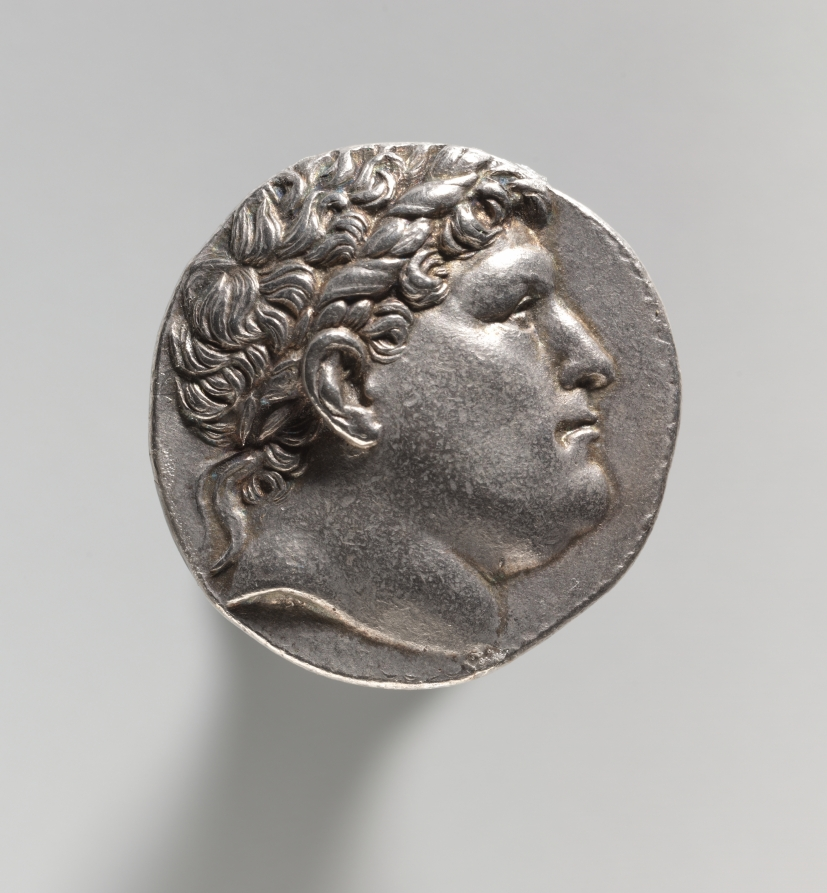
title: Tetradrachm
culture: Anatolia, Kingdom of Pergamum (281–133 BCE), Eumenes I (263–241 BCE)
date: 262–241 BCE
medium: silver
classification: Coins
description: The depictions of rulers found on this coin represents a realistic type of portraiture, similar to that found on coins in the West.